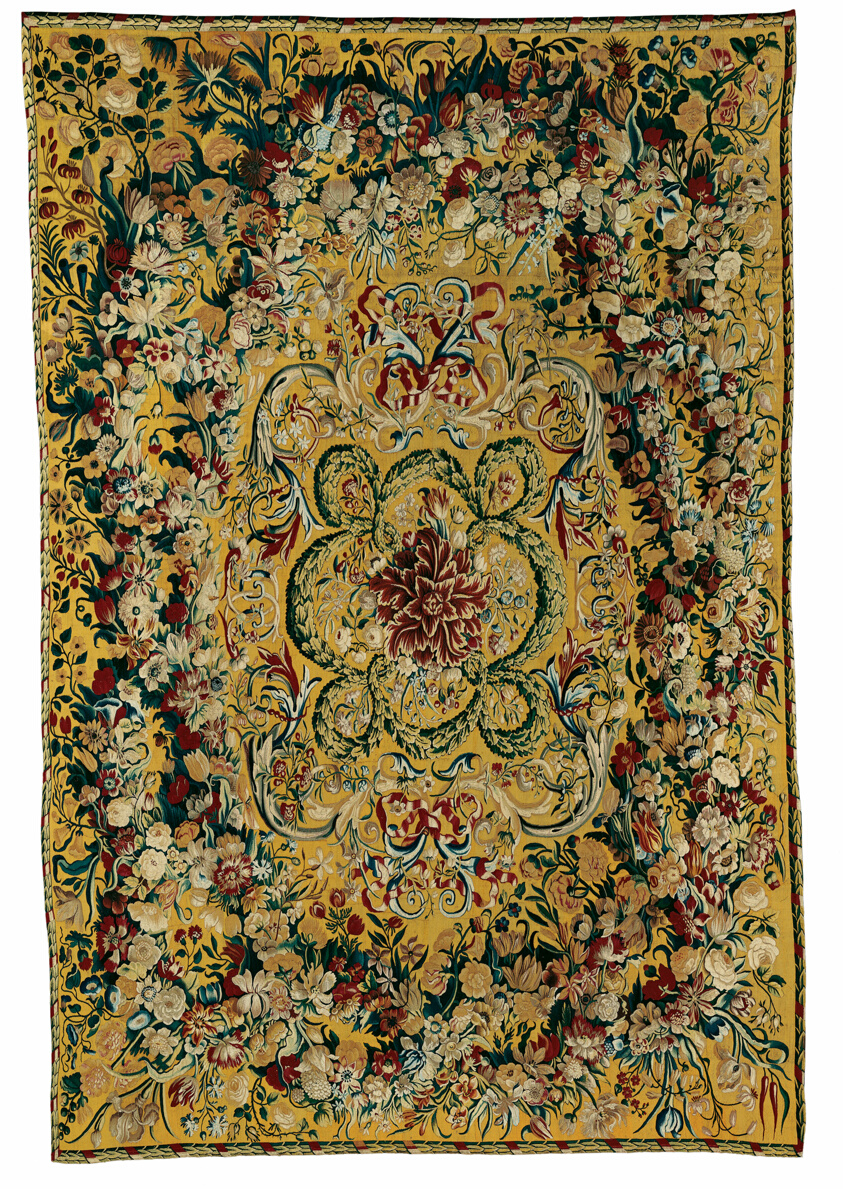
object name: Textile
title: Table Carpet with Garlands of Flowers and Rinceaux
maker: Possibly Flanders or France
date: 1650/75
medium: Wool and silk, slit and double interlocking tapestry weave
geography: Flanders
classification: weaving - tapestry; textile